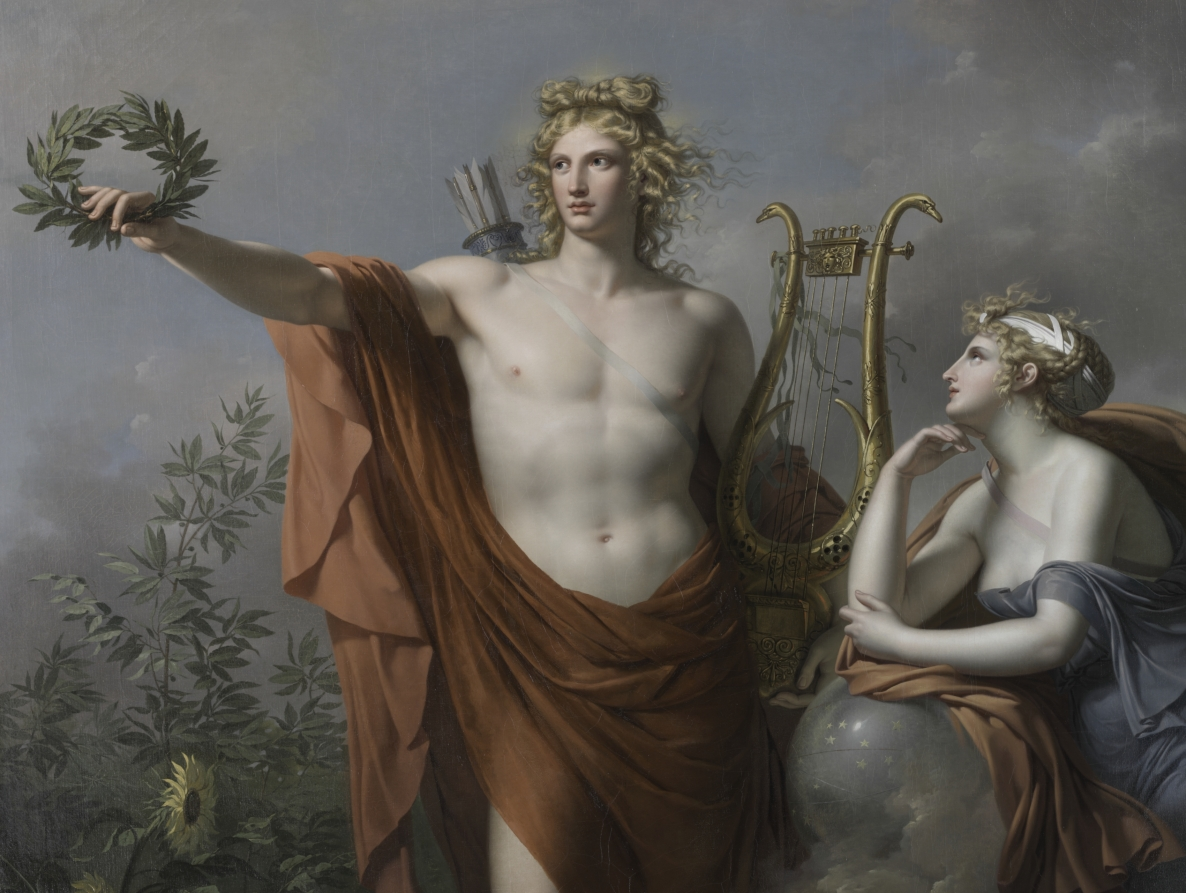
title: Apollo, God of Light, Eloquence, Poetry, and the Fine Arts with Urania, Muse of Astronomy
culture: France, late 18th century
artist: Charles Meynier (French, 1768–1832)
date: 1798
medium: oil on canvas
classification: Painting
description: A recipient of the Grand Prix de Rome in 1789, Charles Meynier became a member of the Académie des Beaux-Arts in 1815 and painted large ceiling decorations at the Louvre and numerous pictures glorifying the Napoleonic legend. Erato, Muse of Lyrical Poetry belongs to a cycle of five paintings executed to fulfill a commission from businessman François Boyer-Fonfréde. They were intended to decorate his home in his native Toulouse and constitute a rare instance of a complete cycle of major paintings that remain intact rather than being split up and separately dispersed.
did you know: Urania leans on a starry orb, indicating her role as the muse of astronomy.